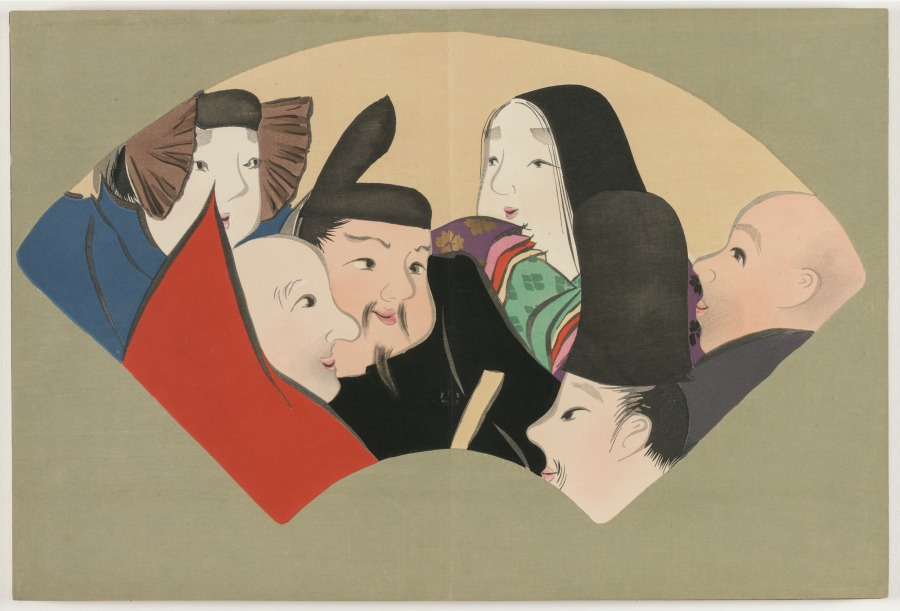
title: Flowers of a Hundred Worlds (Momoyogusa): Six Poetic Immortals (Rokkasen)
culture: Japan, Meiji period (1868–1912)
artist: Kamisaka Sekka (Japanese, 1866–1942)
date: 1909–10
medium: color woodcuts with gold and silver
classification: Bound Volume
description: This print from a set of three woodblock printed albums displays the graphic design prowess of Kamisaka Sekka. The images were first distributed one by one to subscribers to the series but later were reissued in bound form, like this book, for mass consumers. Each print features a vignette taken from nature or Japanese literature. Many of the scenes have a long history in Japan, originating in the 900s or 1000s and having been interpreted by all manner of artists since that time. Sekka’s selections hew closely to precedents from the Rinpa style originated by painter Tawaraya Sōtatsu (c. 1570–c. 1640) and calligrapher Hon’ami Kōetsu (1558–1637).